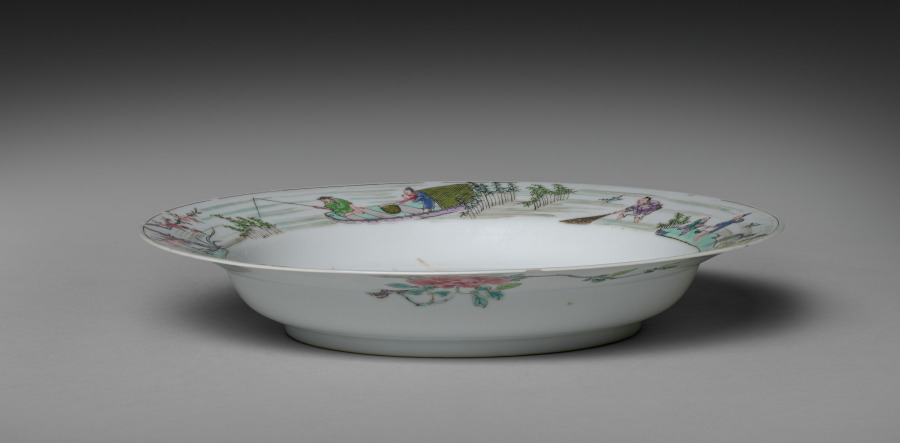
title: Fishermen Plate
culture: China, Qing dynasty (1644–1911), Yongzheng reign (1723–35)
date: c. 1730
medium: porcelain with famille rose enamel overglaze decoration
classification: Ceramic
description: The plate shows four fishermen holding nets and creel. The plate was made during the Yongzheng reign known for its fine porcelain decoration in famille rose colors. Similar scenes of fishermen on paintings of the Ming and Qing period illustrate the popularity of the theme and its adoption by craftsmen and potters.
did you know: The labels on the plate’s base testify the plate was in the former Garland and the Morgan collections.